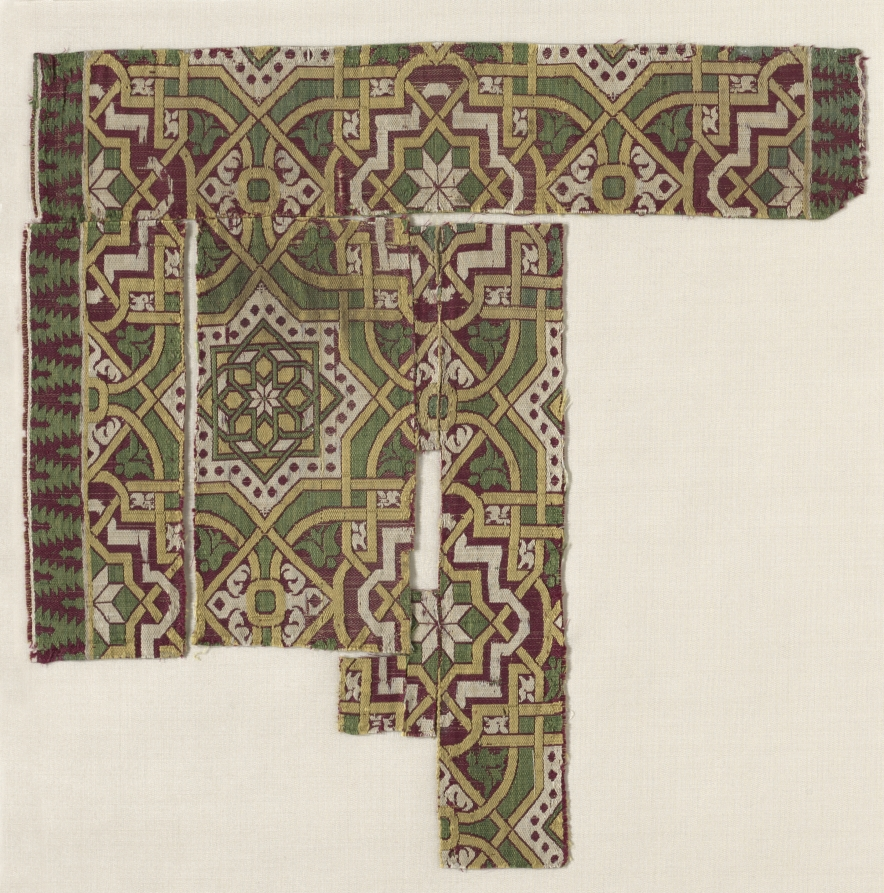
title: Silk Fragment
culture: Spain, Islamic period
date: 14th-15th century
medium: lampas weave, silk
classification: Textile